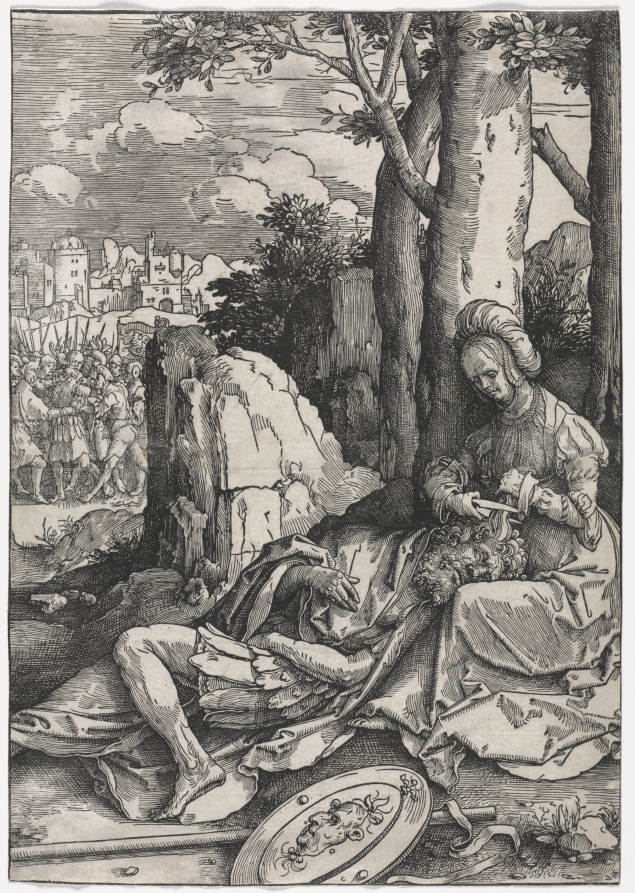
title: The Power of Women: Samson and Delilah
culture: Netherlands, 16th century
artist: Lucas van Leyden (Netherlandish, 1494–about 1533)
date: c. 1512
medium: woodcut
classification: Print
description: The publication of Albrecht Dürer's three impressive woodcut series in 1511—The Large Passion, The Apocalypse, and The Life of the Virgin—had an immediate impact on Northern painters such as Lucas. Lucas's first major designs for woodcuts were six large images whose theme was the power of women, that is, women's ability to dominate man by using wiles and beauty was a subject with broad, popular appeal at the time. The woodcut medium was eminently suitable for the bold, straightforward manner in which Lucas presented his subjects. The moment representing woman's treachery is always depicted as a restrained confrontation: here, Delilah cuts Samson's hair, sapping his extraordinary strength and leaving him vulnerable to the Philistines who wait in the background to seize him. In size, these woodcuts rival Dürer's largest sheets. The motionless figures possess a monumentality that contributes to the dramatic impact.